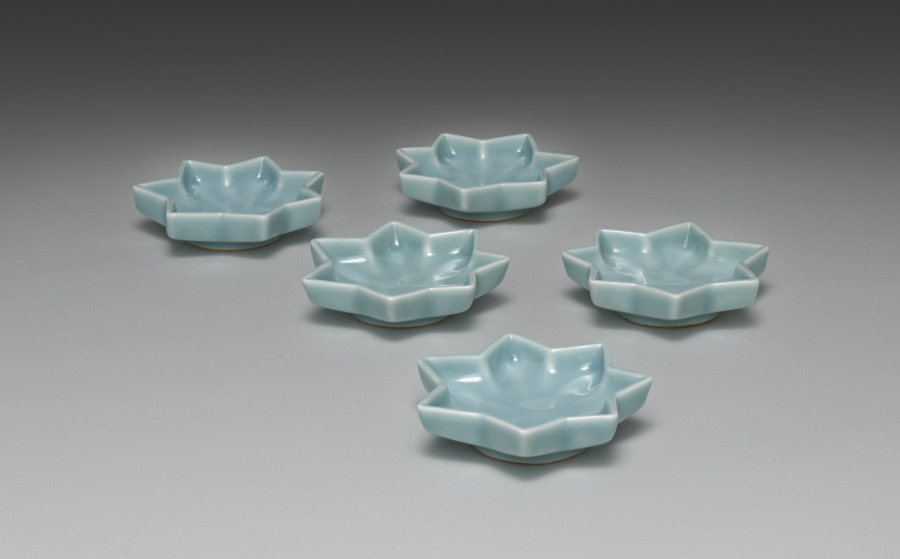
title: Maple Leaf-Shaped Saucers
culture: Japan, Meiji period (1868–1912)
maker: Seifū Yohei III (Japanese, 1851–1914)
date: 1893–1914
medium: Set of five saucers; porcelain with molded design and blue glaze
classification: Ceramic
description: These maple leaf–shaped saucers, like Yohei III's 5 shell saucers CMA 2022.188, have a long, horizontal box with a separate compartment for each piece. Now a set of 5, these dishes were originally a set of 10, stored in two boxes of 5 each. From their housings, which accommodate differing numbers of objects, one can hypothesize that while some items created by the Seifu studio were intended to be acquired in larger sets, and thus were perhaps made to order, others, like these, may have been items to be purchased off the shelf in set quantities that allowed clients flexibility in scale. The box for thesev5 saucers describes them as “heavenly blue[–glazed] porcelain” (tenseiji). The veins of the leaves are slightly raised in the clay so that the glaze pools around them and they stand out as white where the glaze thins. There are longer lines at the points of the leaves and shorter ones following the wall of each indentation so that the design has both a horizontal and a subtle vertical dimension. Each saucer has a round foot.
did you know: These saucers shaped like maple leaves show Seifū Yohei III’s “heavenly blue glaze.”